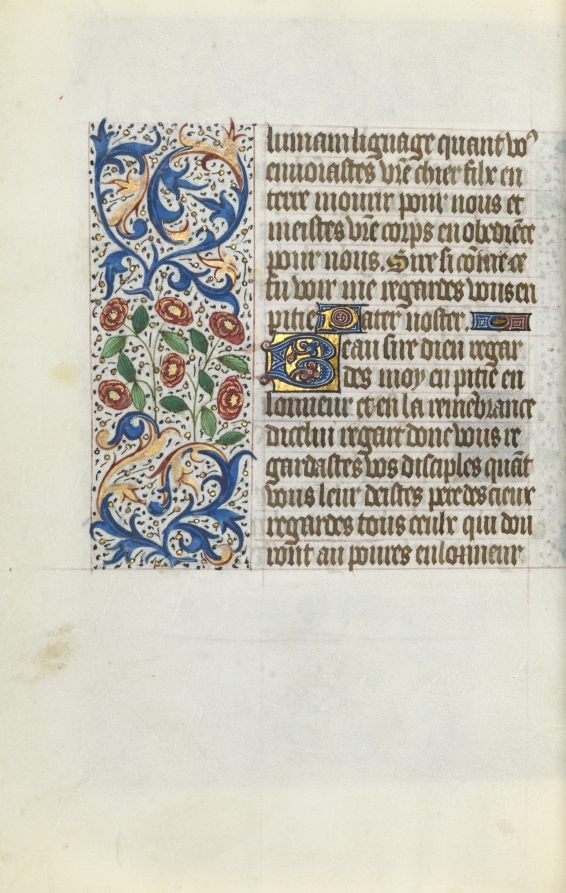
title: Book of Hours (Use of Rouen): fol. 152v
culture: France, Rouen, 15th century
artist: Master of the Geneva Latini (French, active Rouen, 1460–80)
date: c. 1470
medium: ink, tempera, and gold on vellum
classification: Bound Volume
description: In the late 1400s and early 1500s Rouen was an established and important center of book production. The city’s cathedral had a wealthy chapter that spent large sums of money to commission books and to maintain its extensive library. The stationers and booksellers would have likely been concentrated in or near the cathedral precinct. This artist, named after a manuscript now in Geneva, was Rouen’s principal illuminator during the second half of the 1400s.